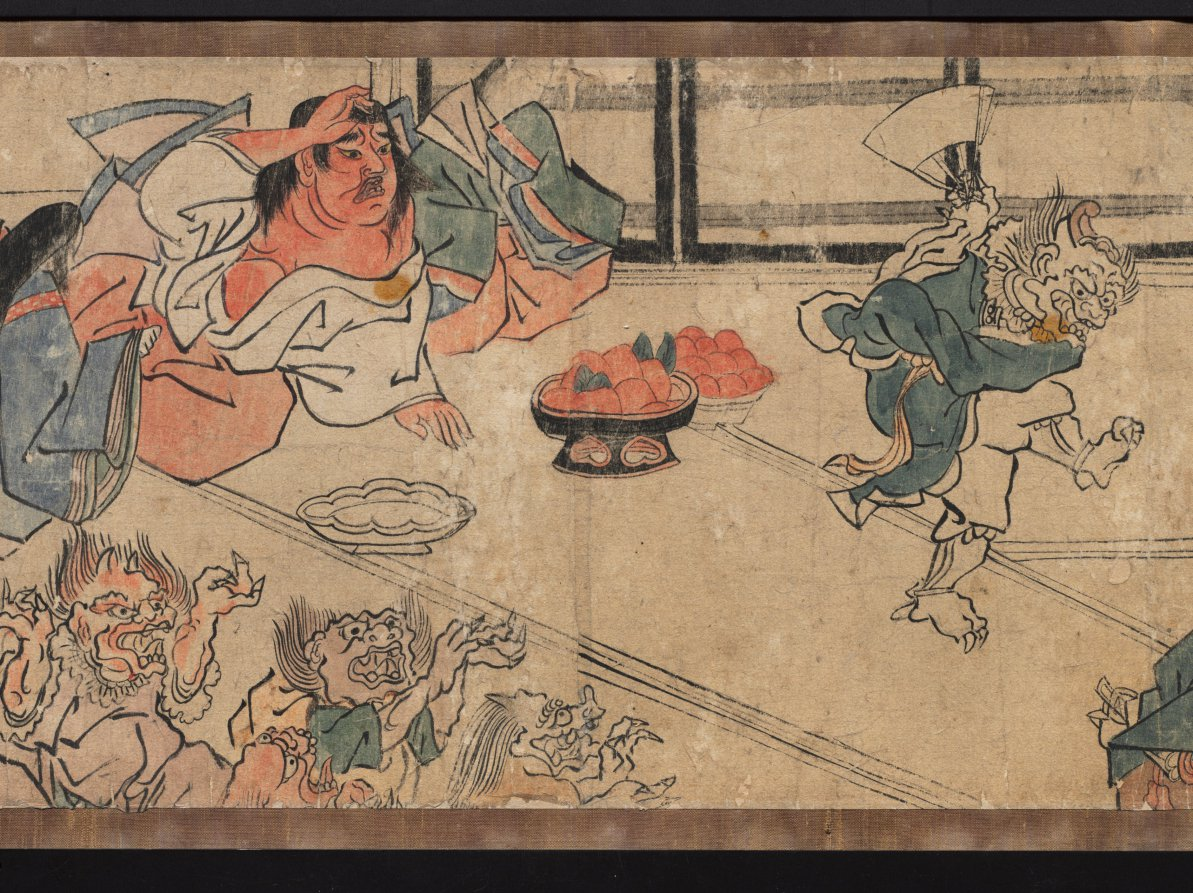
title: Oeyama Engi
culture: Japan, Edo period (1615–1868)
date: 1615–1868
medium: one of a pair of handscrolls; ink and color on paper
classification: Painting